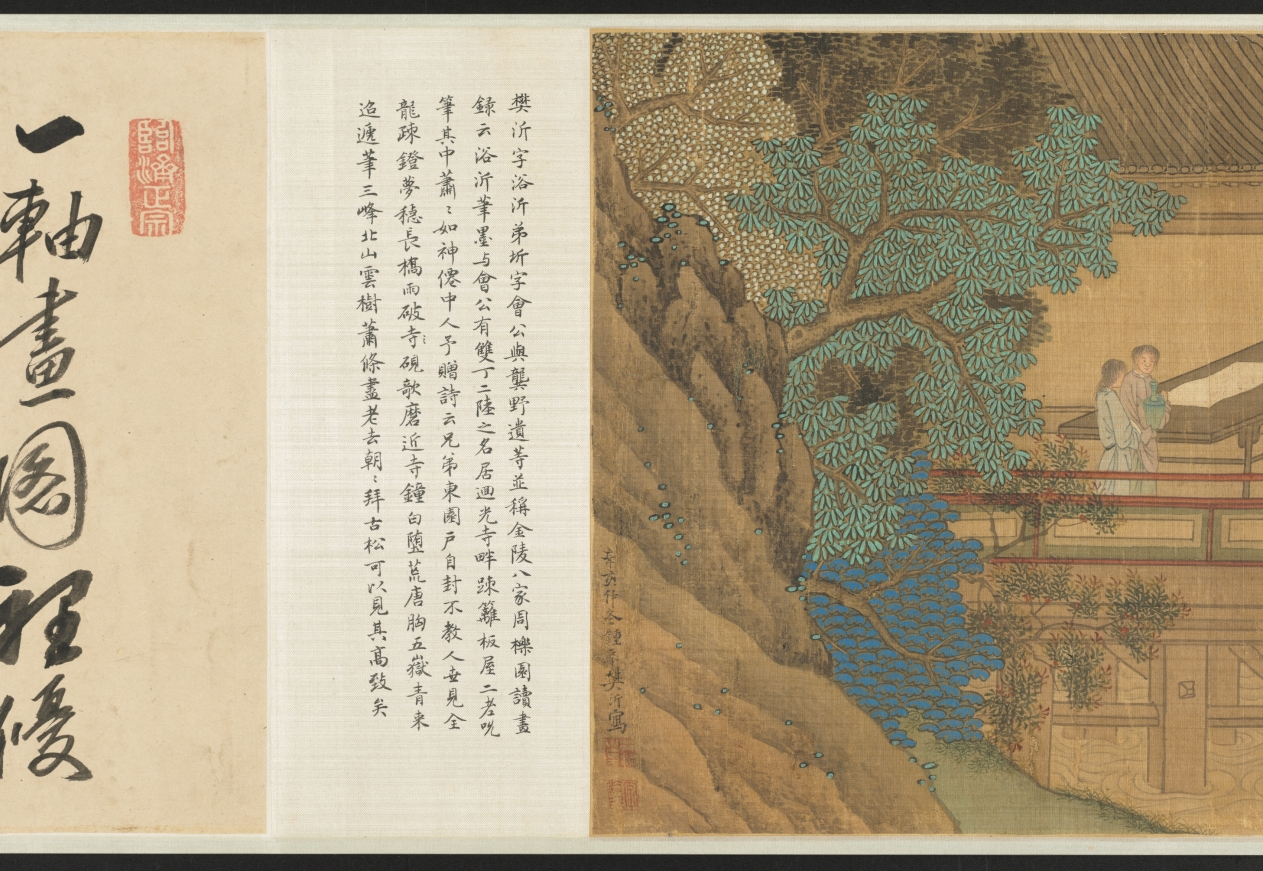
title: Purification at the Orchid Pavilion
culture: China, Qing dynasty (1644-1911)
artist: Fan Yi (Chinese, c. 1615–before 1688)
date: 1671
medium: Handscroll; ink and color on silk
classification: Painting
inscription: Artist's inscription, signature, and 2 seals: Painted by Fan Yi of Zhongfu during the second month of winter of the xinhai year [1671]. [2 seals] Fan Yi zhi yin, Zi yu yi.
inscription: Title on the frontispiece by Monk Yueshan (1629-1709).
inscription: 3 colophons and 13 additional seals: 1 colophon, dated 1707, and 6 seals of Yueshan; 2 colophons and 3 seals of Wong Kwan-Shut (Huang Junshi) 黃君實 (b. 1934); 2 seals of Fu Shen 傅 申 (b. 1937); 2 seals of Tessai Tomioka 富岡鐵齋 (1836-1924).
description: By the 1600s, the historic gathering at Lanting, Zhejiang province, in 353 CE was a common theme in Chinese painting. Originally based on a composition attributed to Li Gonglin (1049– 1106), now lost, Wu school artists revived the theme. Fan Yi, the brother of the artist Fan Qi from Nanjing, used delicate brushwork and luminous colors to depict the spring gathering.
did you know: The gathering’s host is in the Orchid Pavilion at the end of the scroll, representing an episode known as “Wang Xizhi Watching the Geese 王羲之觀鵝圖.”